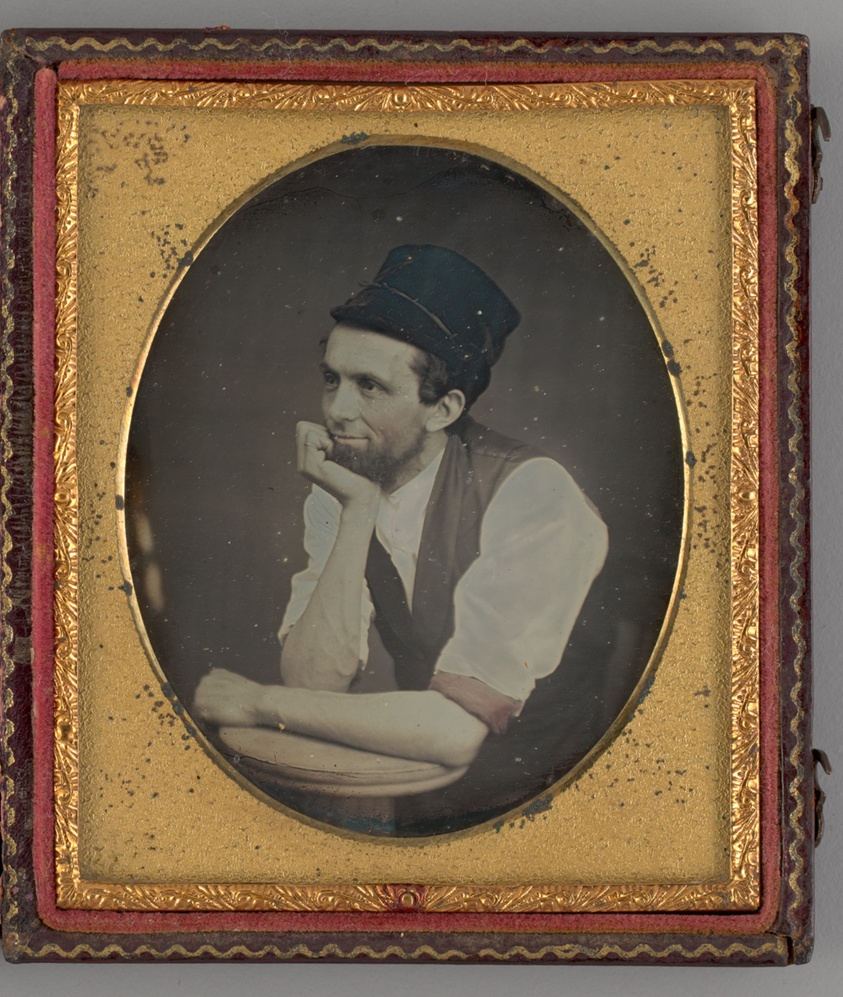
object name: Photograph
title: Untitled (Portrait of Seated Man Wearing a Hat)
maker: Unknown maker; American, 19th century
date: 1854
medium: Daguerreotype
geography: United States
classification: portrait; daguerreotype; photographic process; photography; portrait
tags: lundberg collection, Male, portraits, portraits: male subject